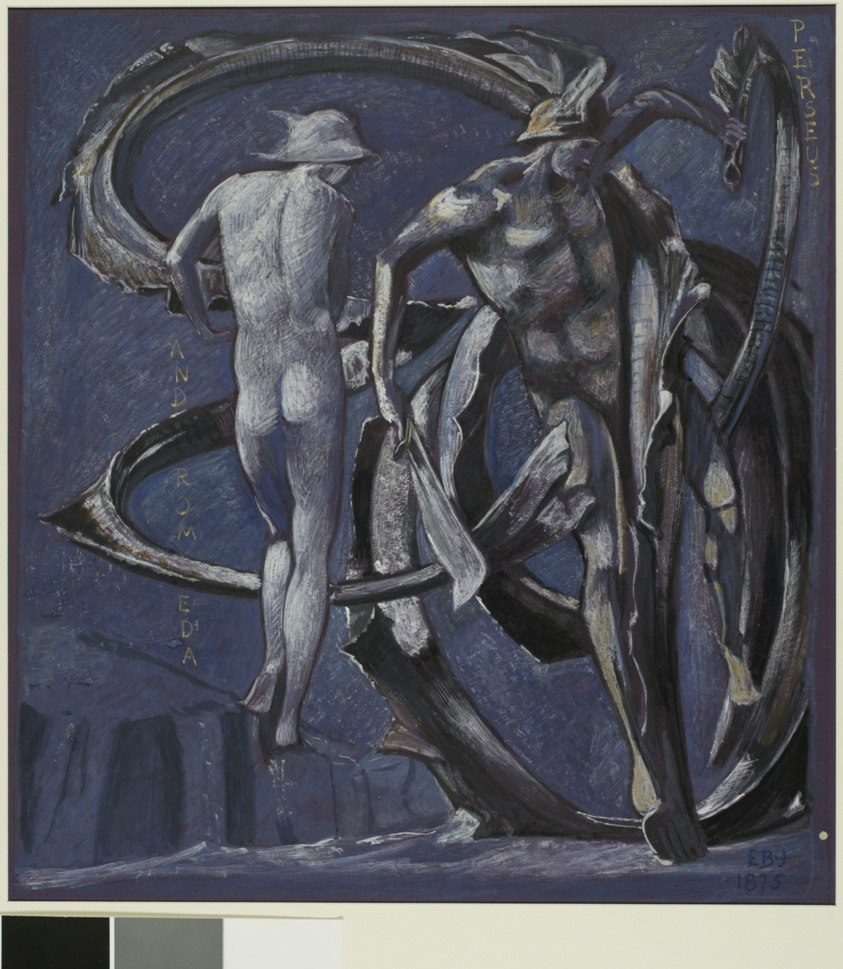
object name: Drawing and Watercolor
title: Perseus and Andromeda, study for The Doom Fulfilled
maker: Sir Edward Burne-Jones (English, 1833-1898)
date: 1875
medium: Gouache with gold paint on board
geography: England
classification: gouache; drawings (visual works); prints and drawing